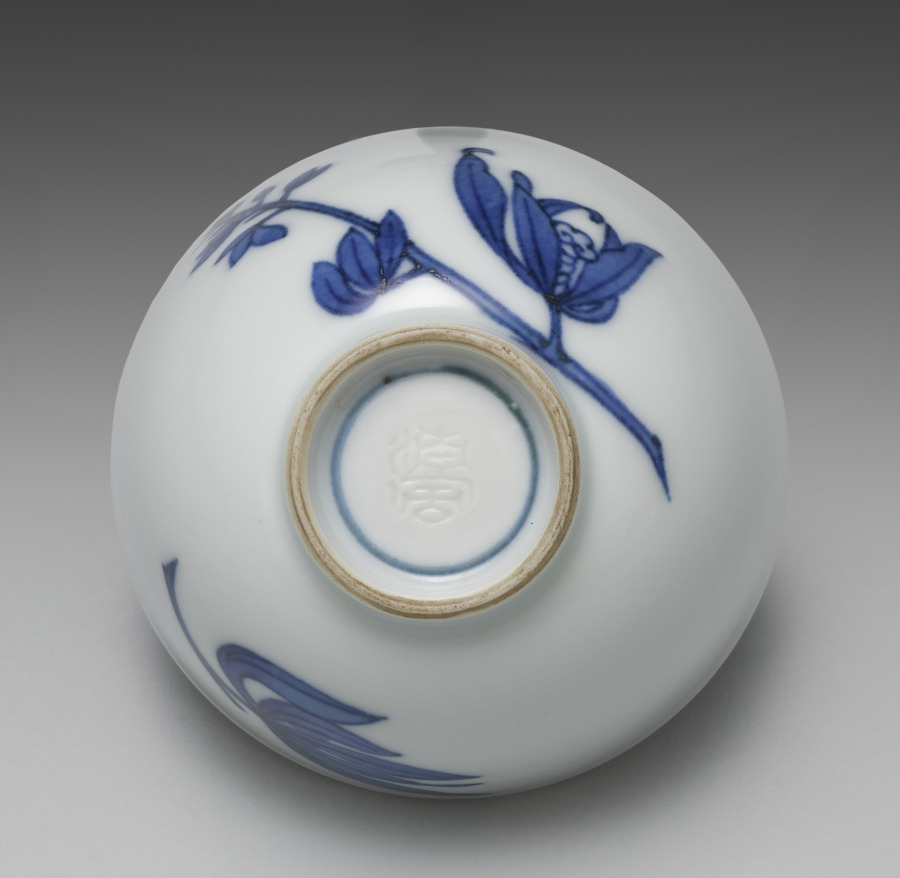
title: Teacup from Tea Set with Orchids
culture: Japan, Meiji period (1868–1912)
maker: Seifū Yohei III (Japanese, 1851–1914)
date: c. 1893–1914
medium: Porcelain with underglaze blue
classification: Ceramic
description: Although the teapot here is stored in a separate box from the five cups, these six pieces may once have been part of a tea set that included other tools such as a water cooler. The teacups have orchid flowers on both sides in underglaze blue, as well as a blue band inside the footring. The teapot has the same design and a blue band painted around the bottom of the lid’s knob. The cups’ long wood storage box is stamped on the exterior, over the lid and base, with a small red seal reading “Satō.” The same seal appears on five small squares of yellow textile, one placed in the bottom of each compartment in the teacup storage box. These are additional to the customary yellow cloths stamped with a “Seifu” seal. Interestingly, four of the Seifū cloths are stamped with an ovoid seal, while the remaining cloth, which is a slightly lighter color, has an unusual seal that is not quite gourd-shaped and with the fū of Seifū in a stylized, unrecognizable form. The teapot has its own box with a Satō seal and is wrapped with an orange textile stamped with the same unusual Seifū seal. A set with a very similar surface design is in the Brooklyn Museum. The Brooklyn set has a water cooler and a small pitcher, in addition to the teapot and cups, and all are in a single storage box. This box records the tea tools as made with kanpakuji, or “bright-jewel white porcelain,” counted among Yohei III’s most important inventions, and carved images. In fact, both sets have a white surface much closer in coloration to the cool white of porcelain clay used in Kyoto at the time, and the designs are simply painted. The Brooklyn set was thus likely mismatched at some point with a box intended for another tea set. Nonetheless, the box may have helped prevent the set’s original components from being dispersed, and the set itself provides insight into how the other tools from the present set may have looked.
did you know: This tea set with orchids has a side-handled pot called a kyūsu, used for steeping, straining, and serving tea.